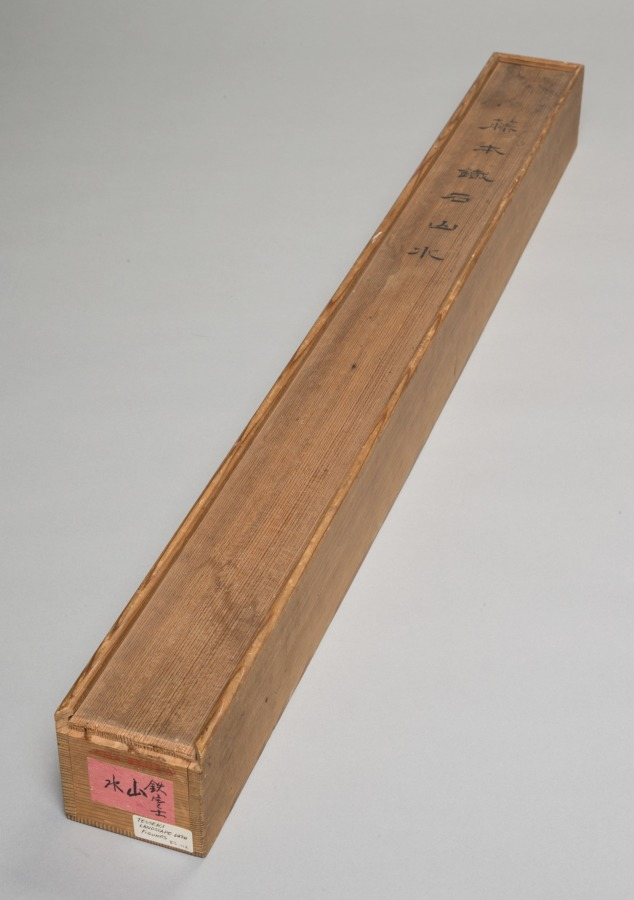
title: Landscape with Figures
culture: Japan, Edo period (1615–1868)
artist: Fujimoto Tesseki (Japanese, 1816–1863)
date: c. 1840–63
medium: hanging scroll; ink and color on paper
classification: Painting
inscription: Artist's inscription and two seals in upper right. A third seal in lower left.